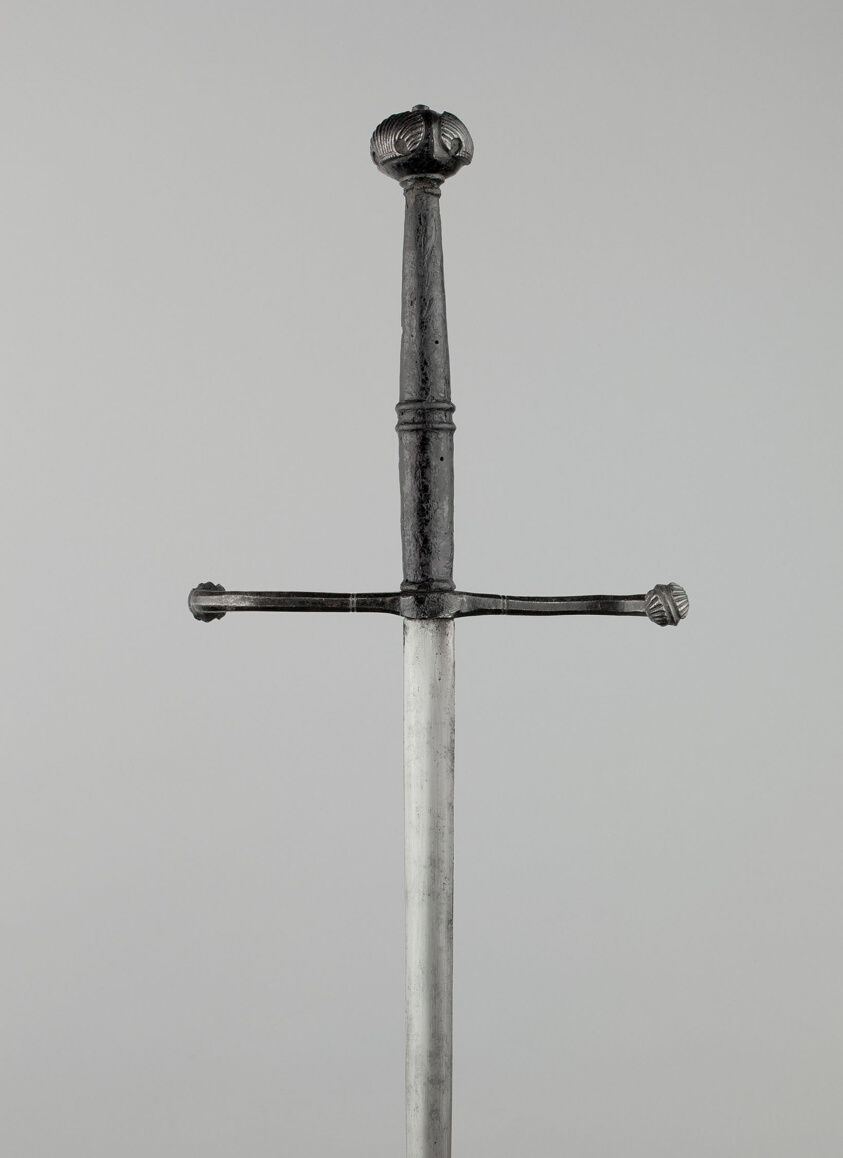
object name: Arms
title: Thrusting Sword (Estoc)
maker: German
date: c.1525—c.1540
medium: Steel, wood, and leather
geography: Germany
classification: edged weapon-sword; arms; arms and armor